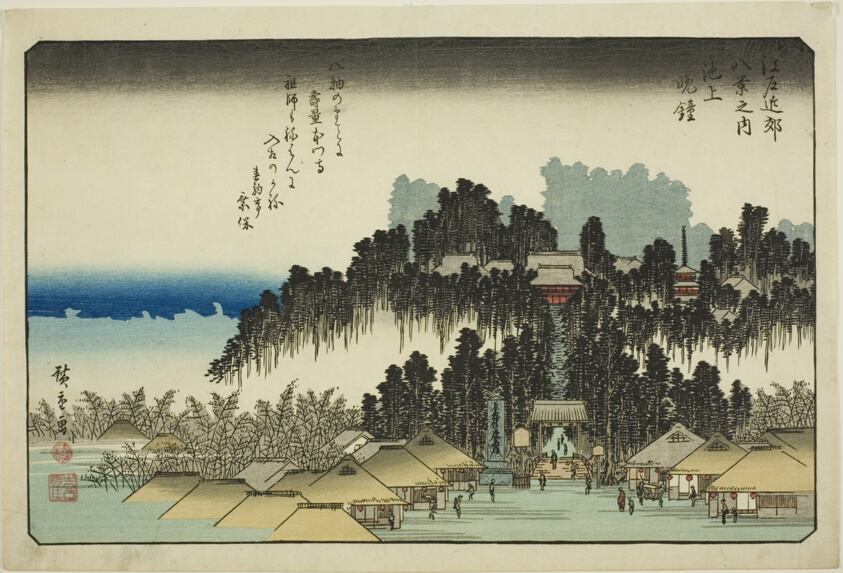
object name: Print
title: Evening Bell at Ikegami (Ikegami no bansho), from the series "Eight Views in the Environs of Edo (Edo kinko hakkei no uchi)"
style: Japanese (culture or style)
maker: Utagawa Hiroshige 歌川 広重; Japanese, 1797-1858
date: c. 1837/38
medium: Color woodblock print; oban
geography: Japan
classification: print; asian art